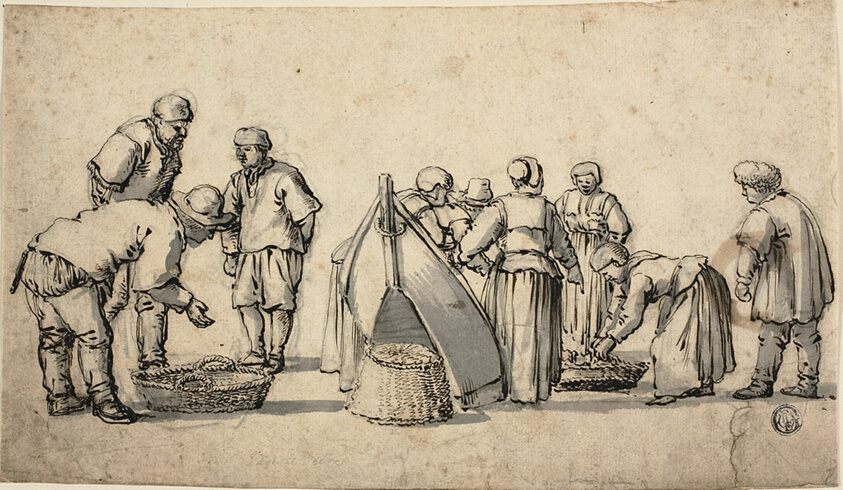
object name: Drawing and Watercolor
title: A Dutch Fishmarket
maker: Willem van de Velde, I (Dutch, c. 1611-1693)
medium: Pen and brown ink, with brush and gray wash over graphite, on ivory laid paper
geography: Holland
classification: pen and ink drawings; drawings (visual works); prints and drawing